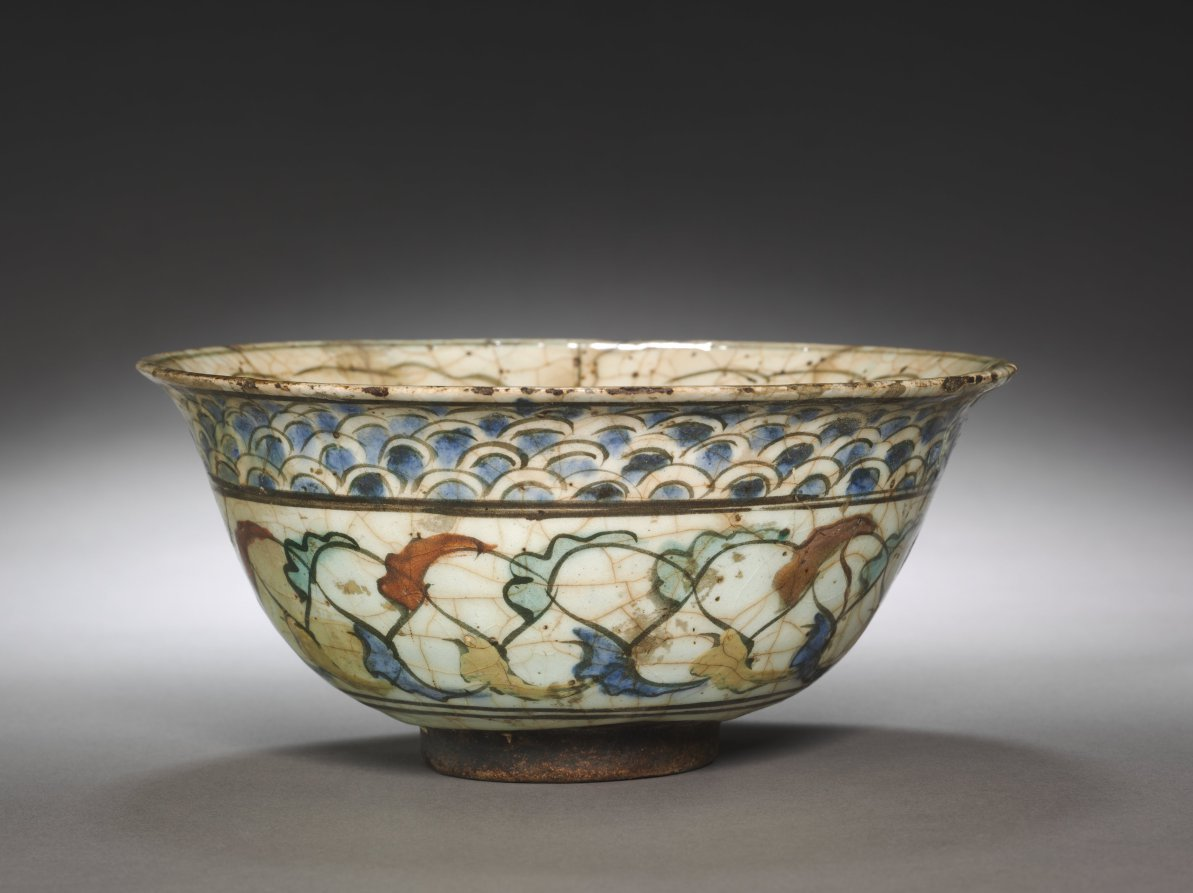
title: Bowl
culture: Iran, Safavid period (1501–1722)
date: early 1600s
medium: Fritware with underglaze design in colored slips, Kubachi ware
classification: Ceramic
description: Sprigs of flowers flowing from little tufts of grass decorate the inside of this bowl. Its sides are divided into panels by thin black lines. The outside is divided into two bands of decoration: above are scale-like motifs formed by black lines worked in with blue and below are arabesques with simple leaves in cobalt blue, copper green, and red-brown.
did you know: This type of pottery is named after a town in the Caucasus region, but likely most Kubachi wares were made in northwestern Iran.